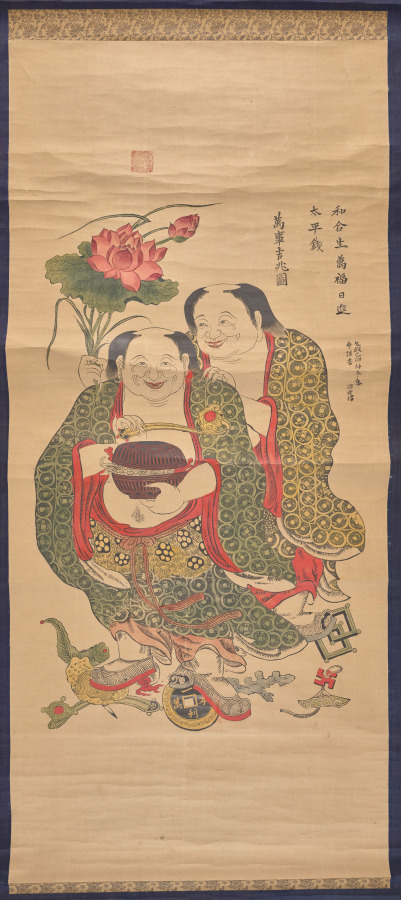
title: The Two Immortals of Harmony and Unity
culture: China, Qing dynasty (1644–1911), Qianlong reign (1736–95)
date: 1736–95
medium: Hanging scroll; polychrome woodblock print; ink and color on paper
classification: Print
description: Woodblock printing in color reached a height in China in the 1600s to 1700s. The prints were executed by means of sets of separate blocks, each carved to print a different color.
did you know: In the 1600s, printing flourished in such Jiangnan cities as Nanjing, Suzhou, Hangzhou, and Huizhou, evolving from privately enjoyed illustrated books printed in color to more commercialized single-sheet color prints that were hung on walls and became part of the rich urban visual culture.